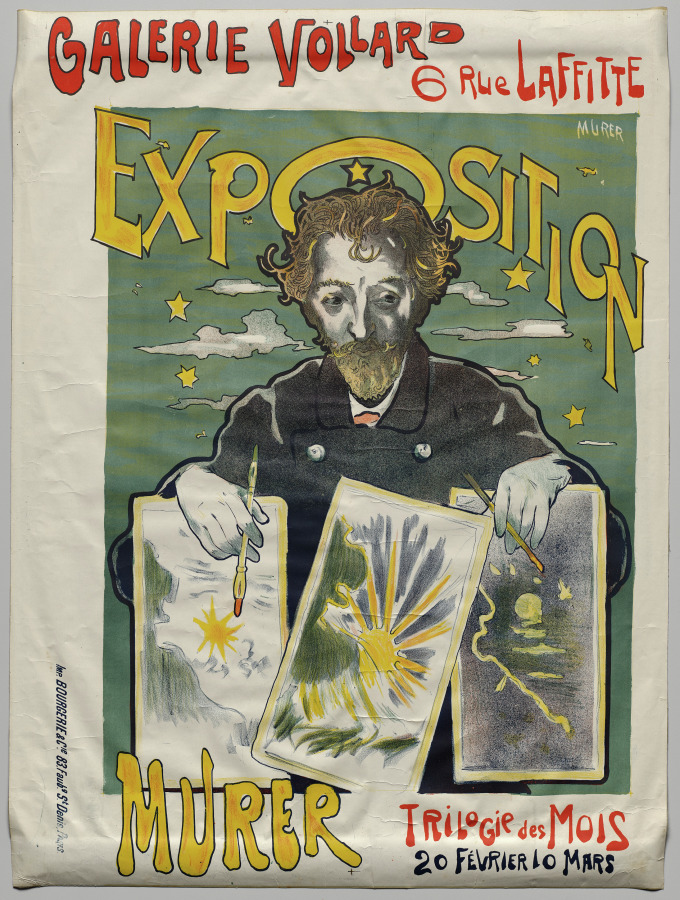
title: Trilogy of Months, state II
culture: France, late 19th-early 20th century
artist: Eugène Murer (French, 1845–1906)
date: c. 1896–1906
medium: color lithograph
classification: Print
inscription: in plate upper right: Murer